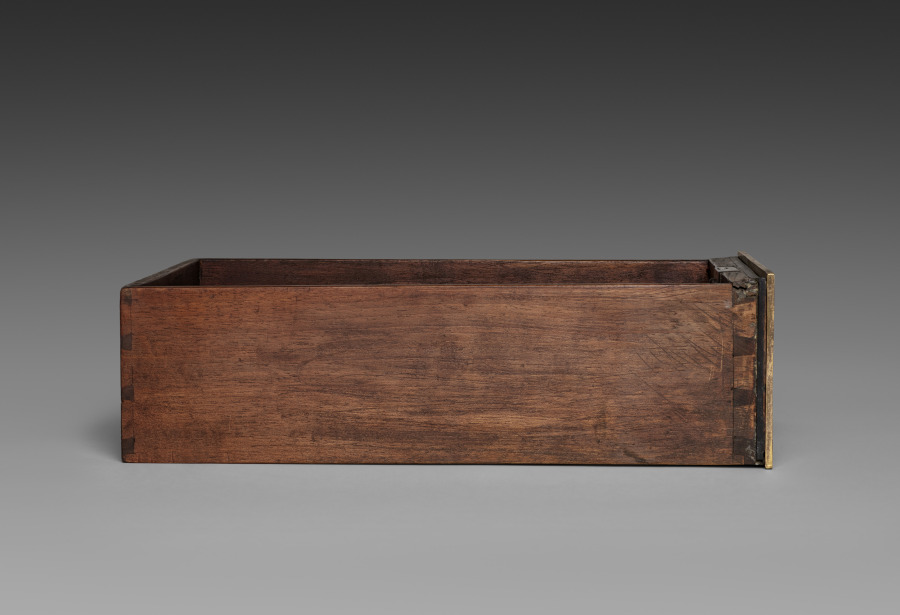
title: Side Drawer for Cabinet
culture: France, late 17th Century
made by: André-Charles Boulle (French, 1642–1732)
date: c. 1690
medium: ebony, marquetry in metal and tortoise shell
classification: Furniture and woodwork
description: Appointed cabinetmaker to King Louis XIV in 1672, André-Charles Boulle became a master of furniture making in France during the late 1600s until his death in 1732. Known primarily for his use of marquetry, in which metal patterns are inlaid into tortoiseshell then applied within the veneered surface of the furniture, Boulle established a level of quality and craftsmanship few others could achieve. As a result, his work found favor at the royal court and among other aristocrats and diplomats eager to impress the king. The inclusion of a medallion depicting Louis XIV within the bronze decoration of this chest would have identified the owner with the royal court. Often exhibiting stout architectural proportions with elegant groups of inlaid motifs such as the parrot on the central panel of this chest, Boulle’s designs are an example of the intellectual fashion for contrasting ideas, materials, and motifs.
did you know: Originally designed to sit atop an elaborate tall stand, this chest was likely altered in the late 1700s to reduce its scale and height.